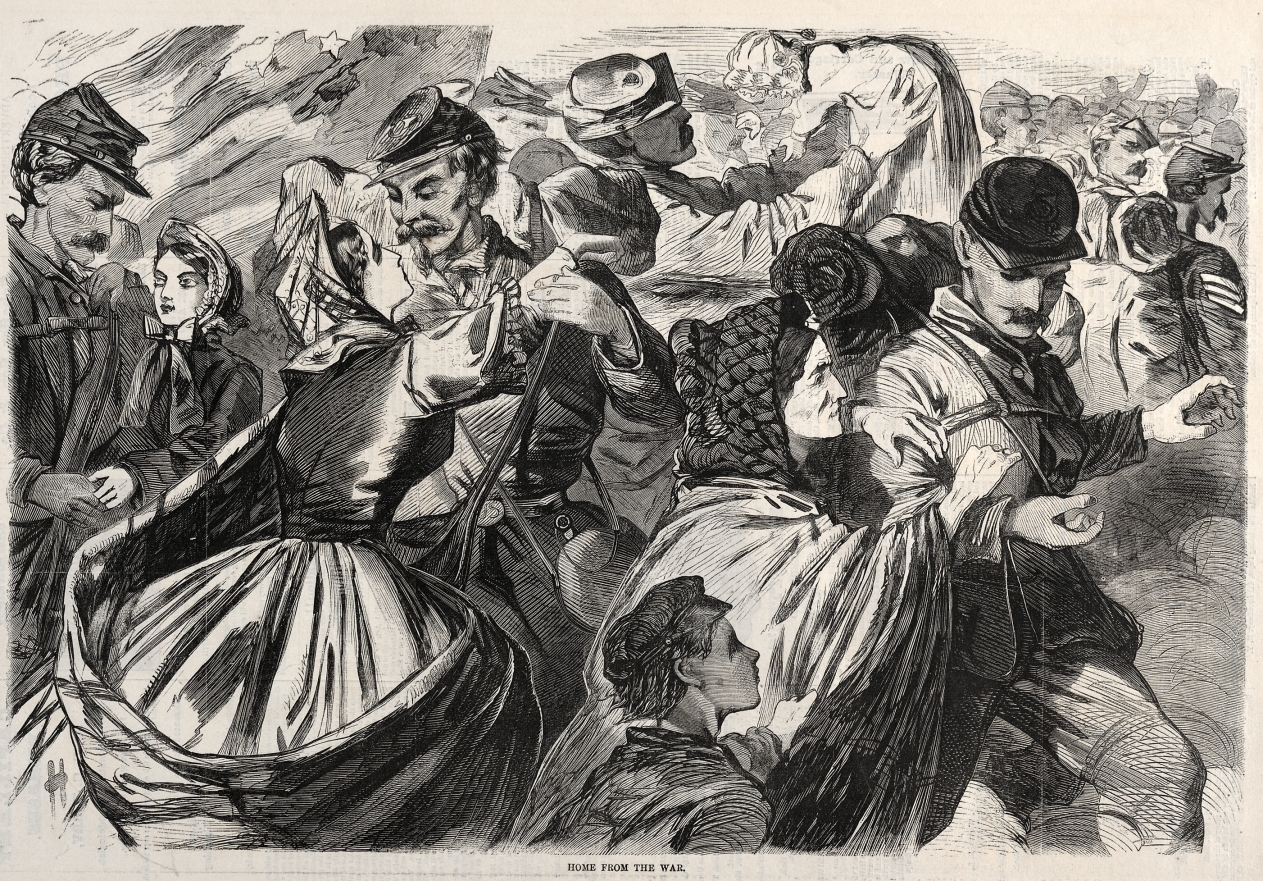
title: Home from the War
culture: America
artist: Winslow Homer (American, 1836–1910)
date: 1863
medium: wood engraving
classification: Print